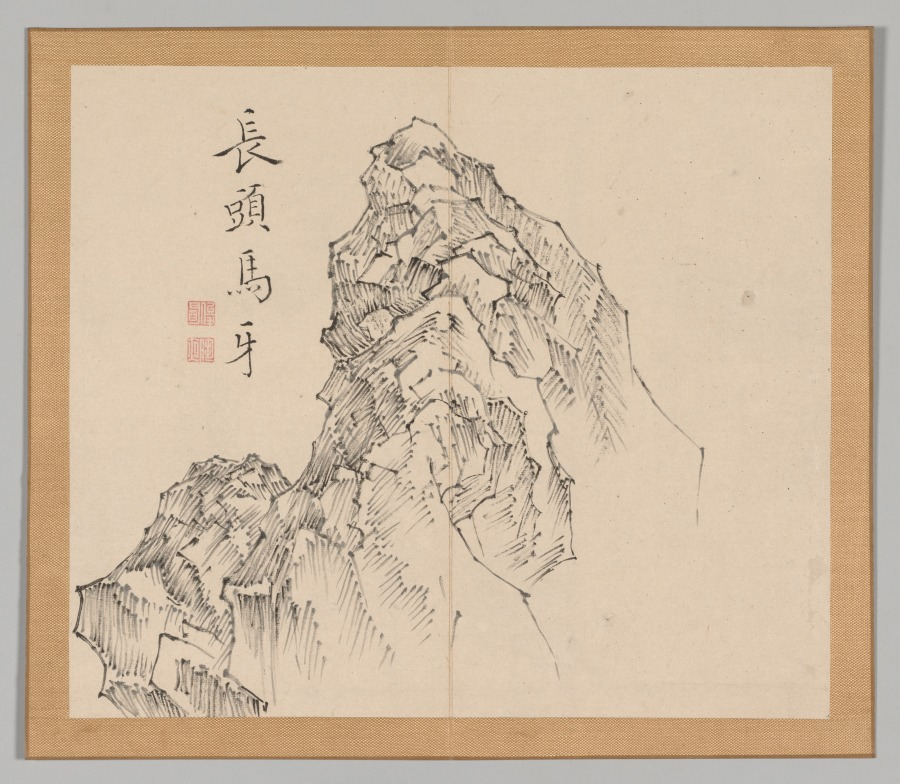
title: Reverberations of Taiga, Volume 1 (leaf 17)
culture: Japan, Edo period (1615–1868)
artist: Aoki Shukuya (Japanese, d. 1802)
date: mid- to late 1700s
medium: double-leaf from a pair of albums; ink and light color on paper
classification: Portfolio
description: Traditionally, young painters in Japan began their studies with an established master-painter. The master's compositions invariably became models that the apprentice copied to learn various ink and brush techniques. Shukuya was a pupil of the famous Kyoto artist Ikeno Taiga, whose style is reflected in these sketches of rocks, trees, and mountains.